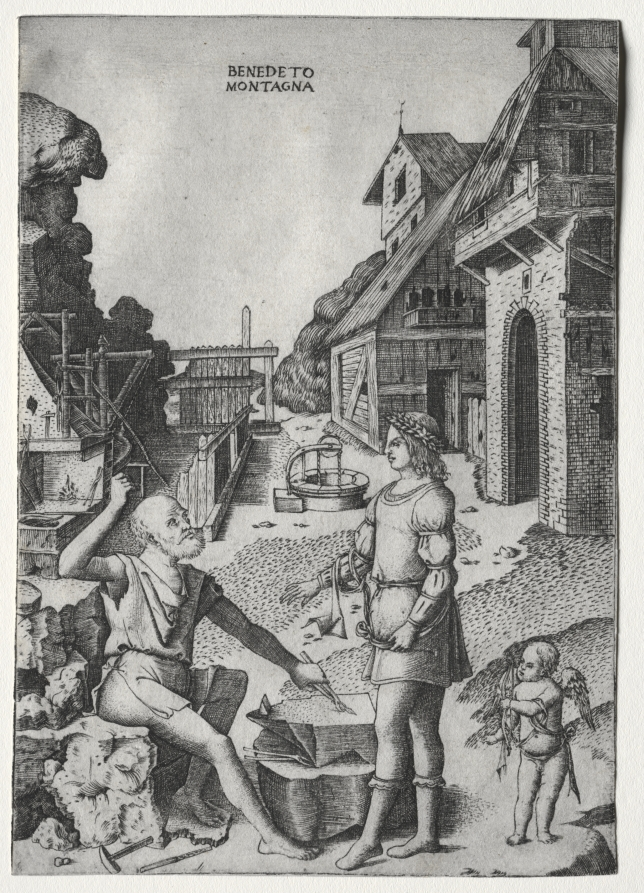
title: Vulcan, Apollo and Cupid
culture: Italy, 16th century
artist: Benedetto Montagna (Italian, c. 1481–1555/58)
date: c. 1515–20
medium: engraving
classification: Print